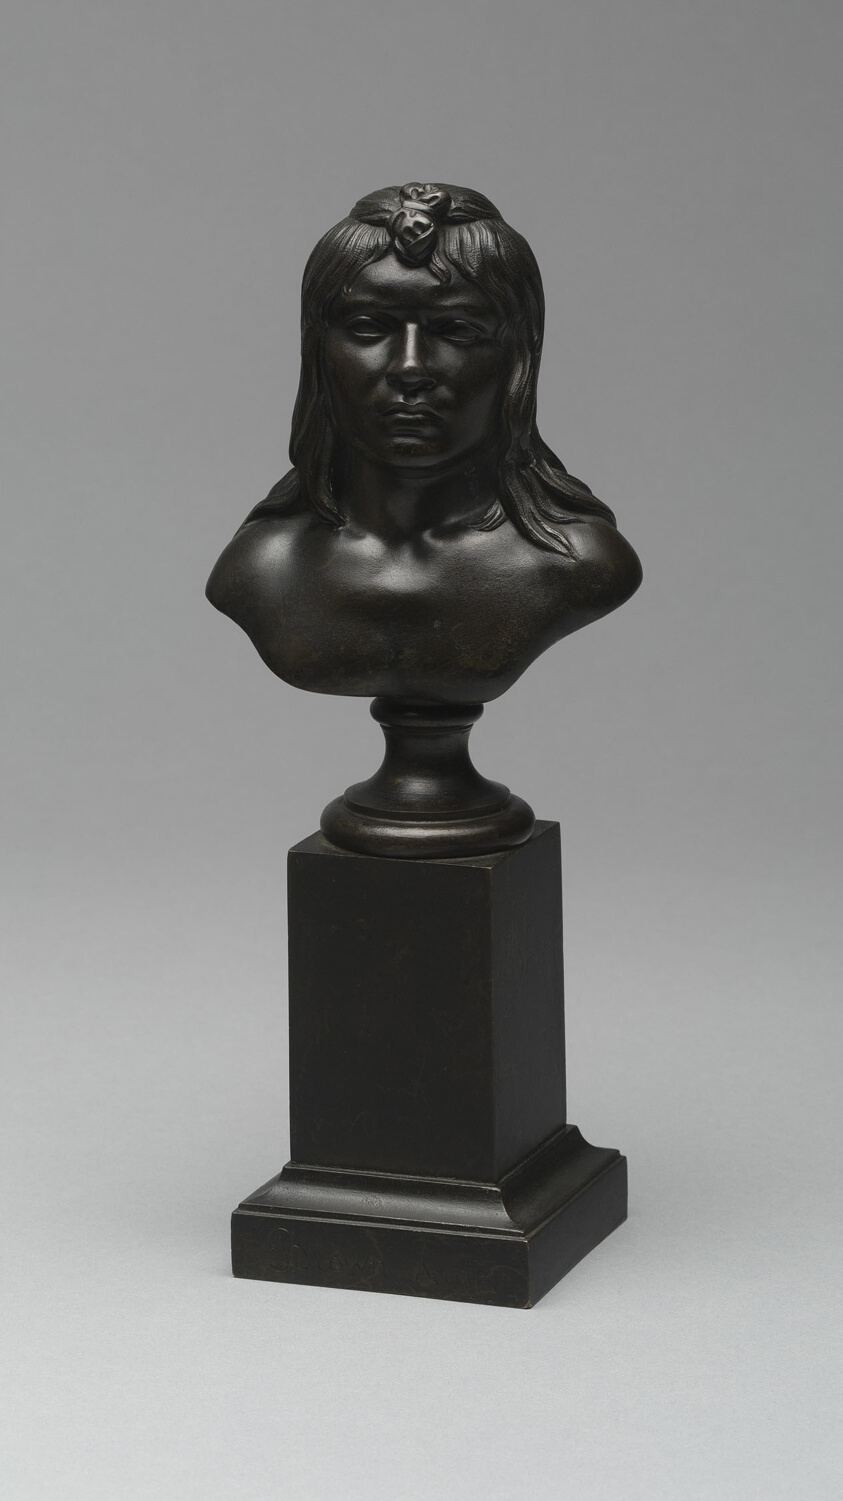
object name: Sculpture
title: Bust of an American Indian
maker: Henry Kirke Brown (American, 1814–1886)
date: Modeled 1848–49, cast 1849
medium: Bronze on bronze plinth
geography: United States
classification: bronze; bust/head; sculpture; miniature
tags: people, portraits